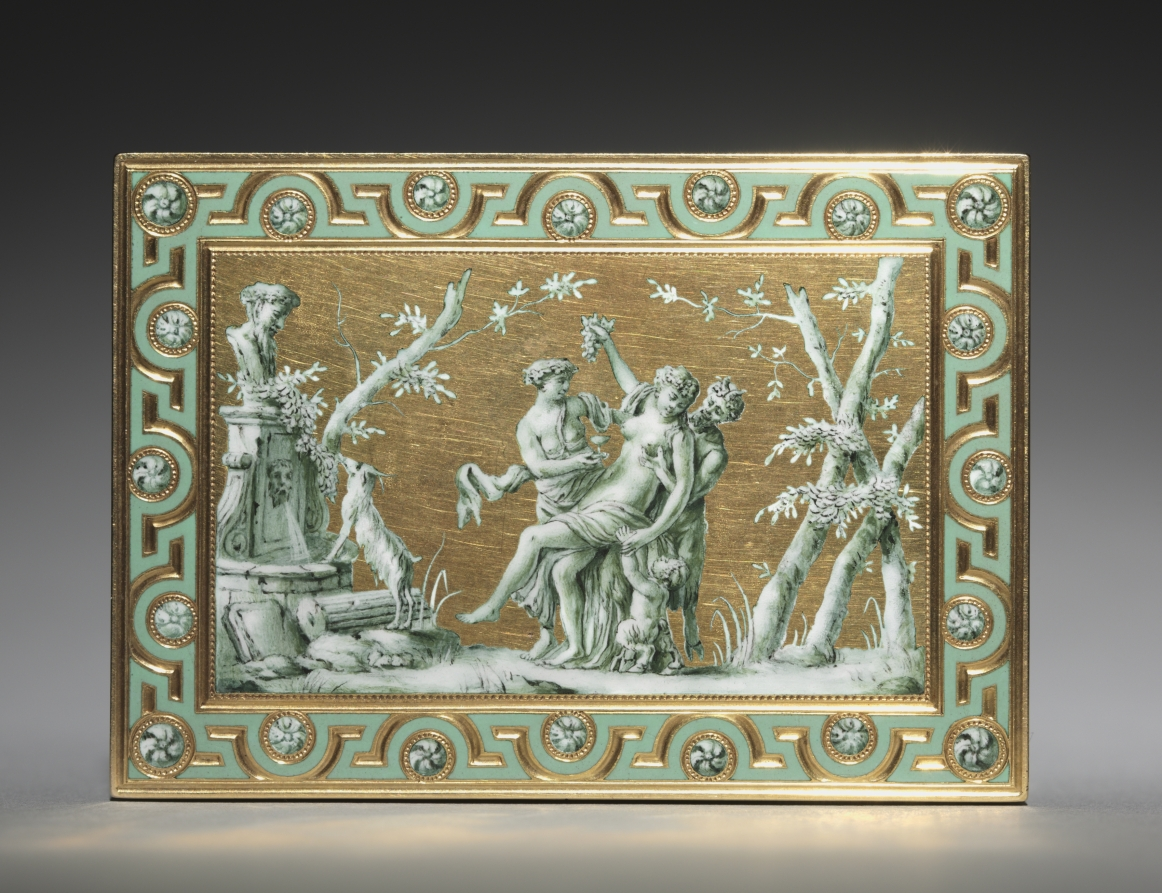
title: Box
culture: France, 18th century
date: c. 1768–1769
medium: gold and enamel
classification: Enamel